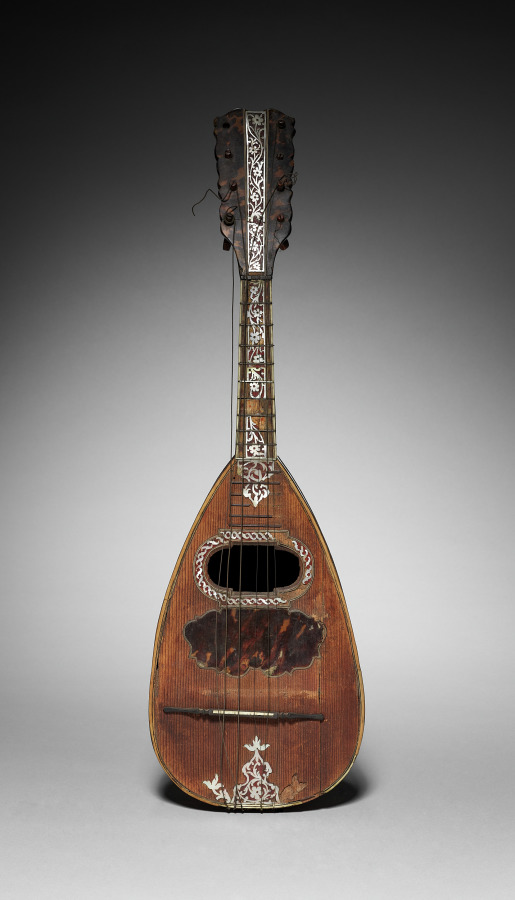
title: Mandolin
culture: Italy, Naples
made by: Giovanni Battista (Italian)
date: 1785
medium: varnished wood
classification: Musical Instrument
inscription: on ticket inside: "Gio: Battista Fabricatore fecit. An, 1785 in S. M. dell' Ajuto, Napoli."